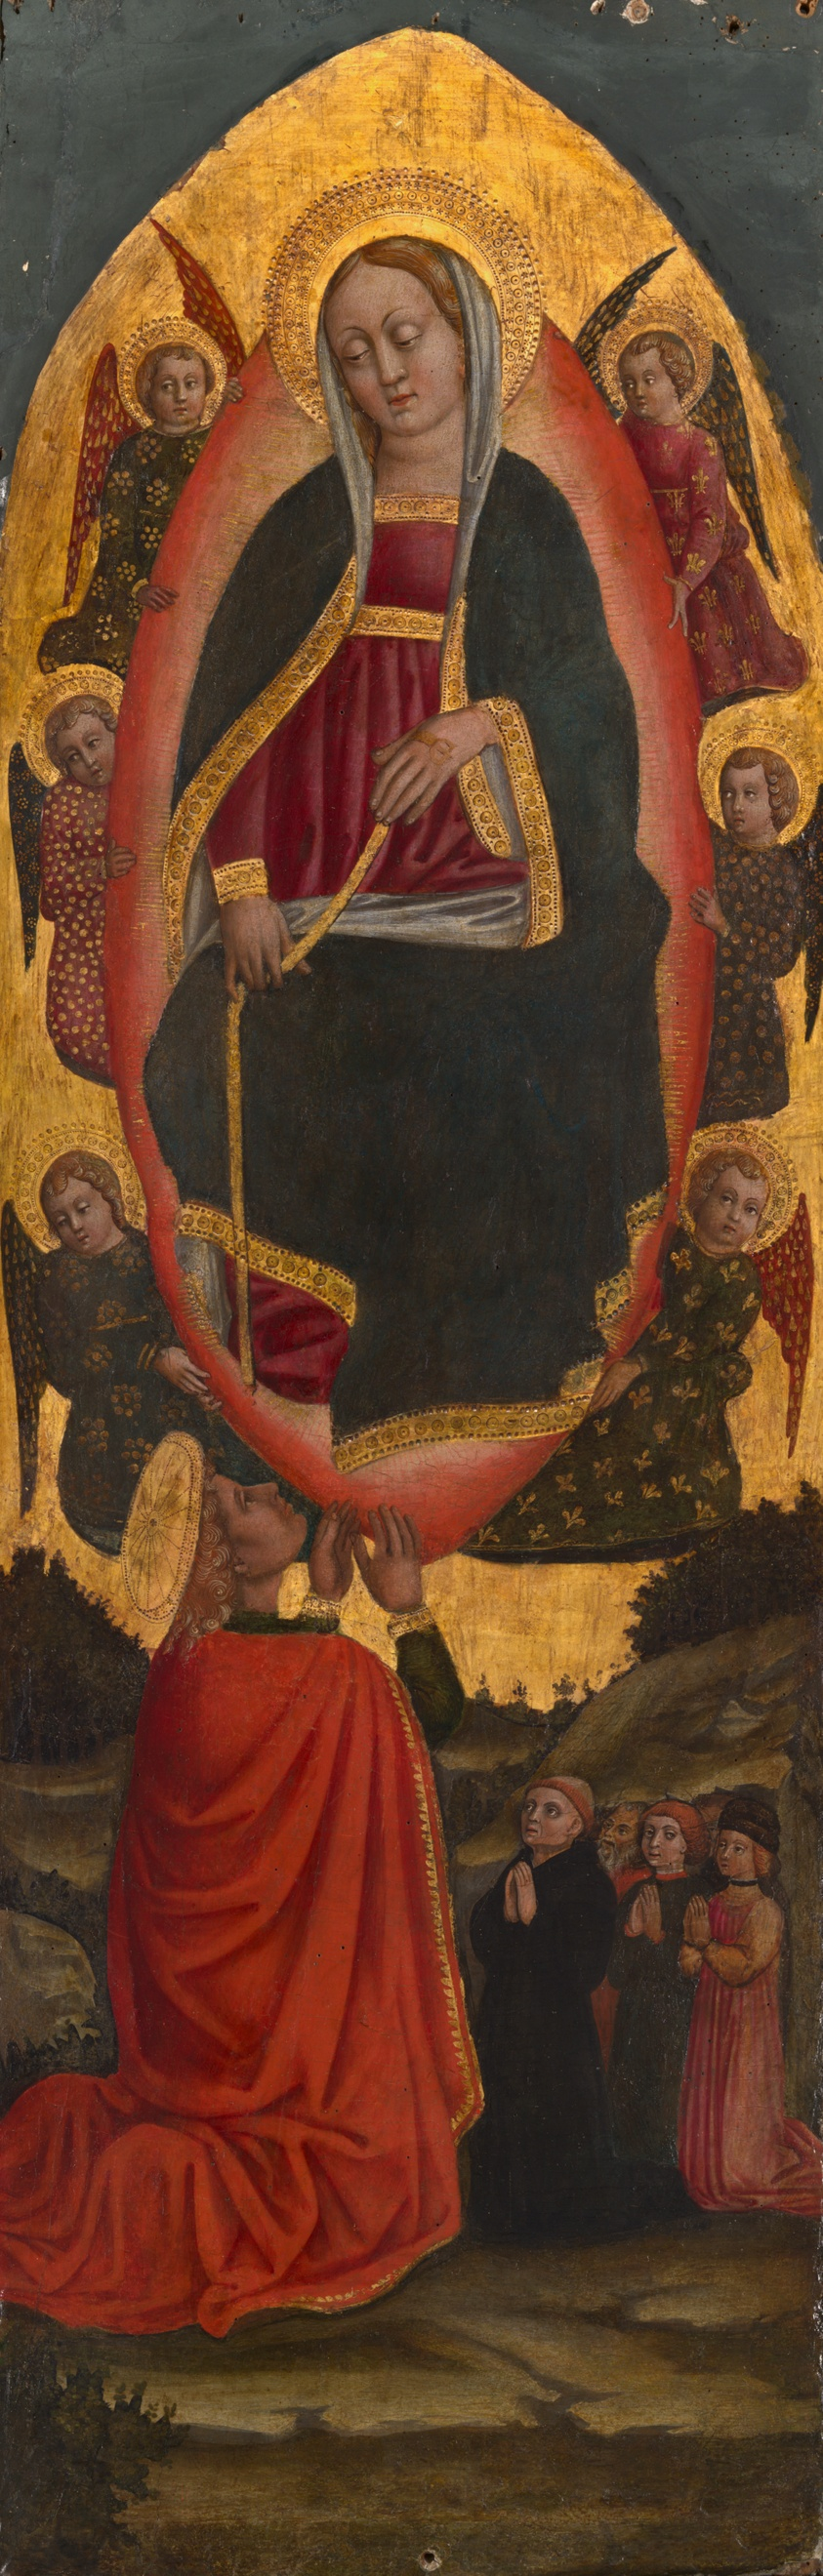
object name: Painting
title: The Assumption of the Virgin with Saints from an Augustinian altarpiece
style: 15th century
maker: Italian; Venice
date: 1450/75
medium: Tempera and oil on panel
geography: Venice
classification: altarpiece; tempera; altar; Italian; oil on panel; oil paintings (visual works); painting; european painting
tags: Virgin Mary, altar, Christian subjects, Christianity, religion, religious, religious attire, religious figures, religious scenes, saints, gold (color), prayer, angels